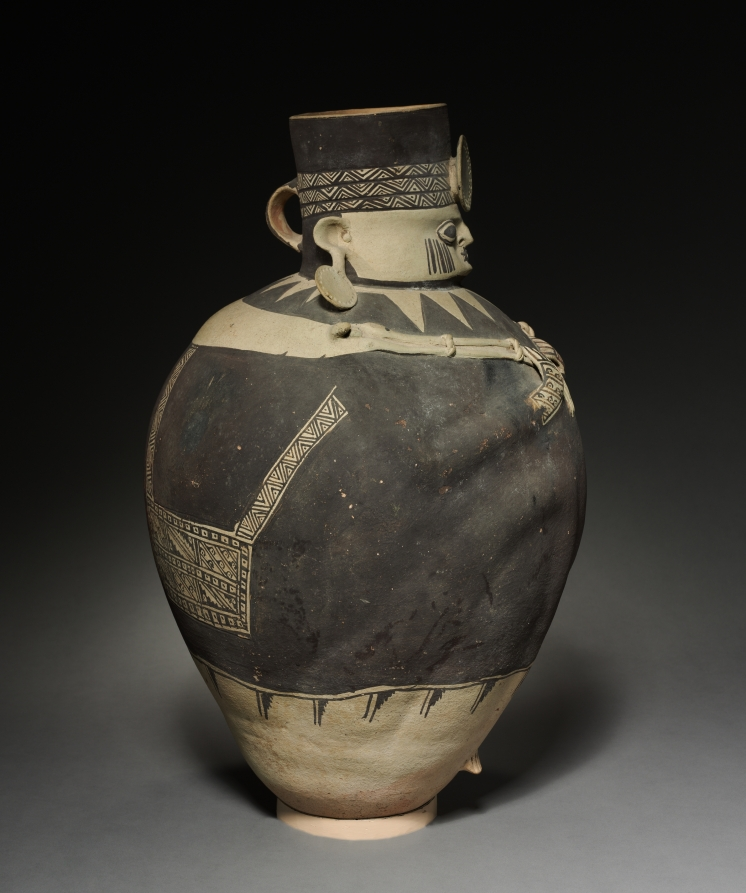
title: Vessel in the Shape of a Figure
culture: Peru, Central Coast, Chancay sytle, 12th-15th century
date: 1000–1460s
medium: earthenware with painted slip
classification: Ceramic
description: This seated figure carries a stag over his shoulders, its antlers now missing and its tongue lolling out in death. That the stag is destined for more than dinner is suggested by the human's pursed lips--perhaps the kiss-like expression of reverence that the later Inka made when approaching a sacred shrine. The animal, then, may be an offering. The two bags painted on the figure's back may be for coca leaves, also very important for rituals. In comparison to earlier ceramics, the Chancay style seems less fine both artistically and technically. yet as this vessel proves, the best Chancay ceramics have appealing charm, in part because of their bold brown-on-white color scheme.